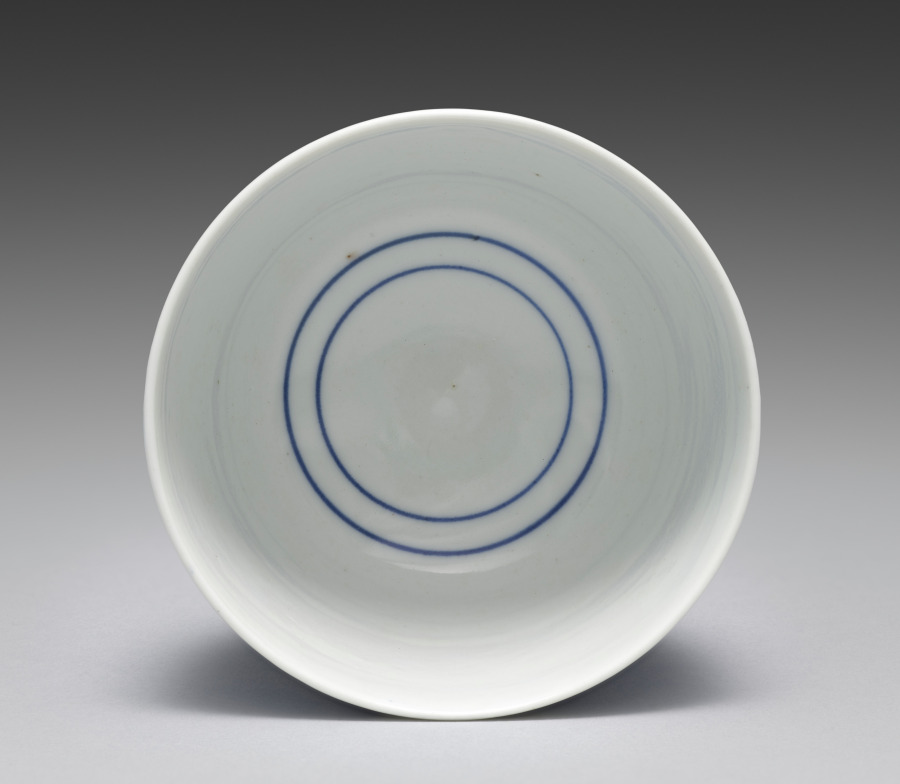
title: Teacup from Teacups with a Hundred Sages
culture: Japan, Meiji period (1868–1912)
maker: Seifū Yohei III (Japanese, 1851–1914)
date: 1893–1914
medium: One from a set of five teacups; porcelain with underglaze blue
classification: Ceramic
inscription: 清風造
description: Each of these five teacups has a painting of identical design in underglaze blue, but as the tiny figures are drawn entirely by hand, each cup has its own personality. The theme of the sencha cups is an assembly of sages or immortals, literally “a hundred venerable [people]” (hyakurō). The myriad figures crowd the scene in groups. The god of longevity, with his tall forehead, sits with his cranes, having flown in from Mt. Penglai on the Isle of the Immortals. Seven long-bearded sages sit around a stone table, chatting and drinking; one is seated on an enormous gourd. Of course, there is a stack of books on the table, and elsewhere, scrolls are being written upon or read—in one case held very close by a sage who is wearing glasses. The design was enormously popular in ceramics made for those engaged in literati culture.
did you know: Seifū Yohei III (1851–1914) produced many works for tea gatherings where people drank Chinese-style leaf-tea (sencha).